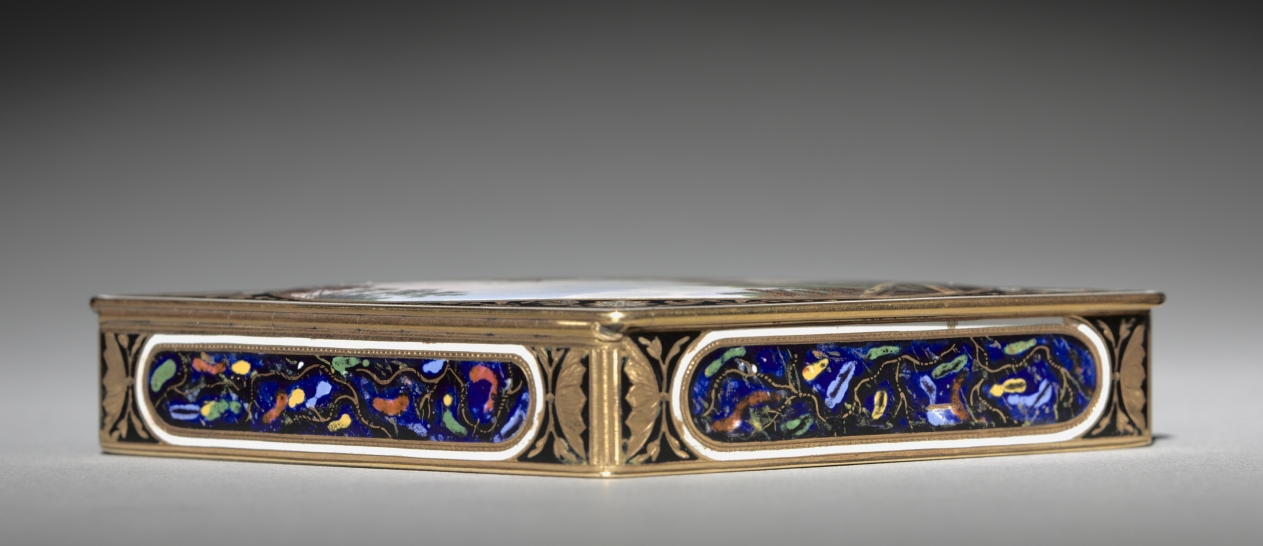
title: Box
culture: Switzerland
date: early 1800s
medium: gold and enamel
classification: Enamel